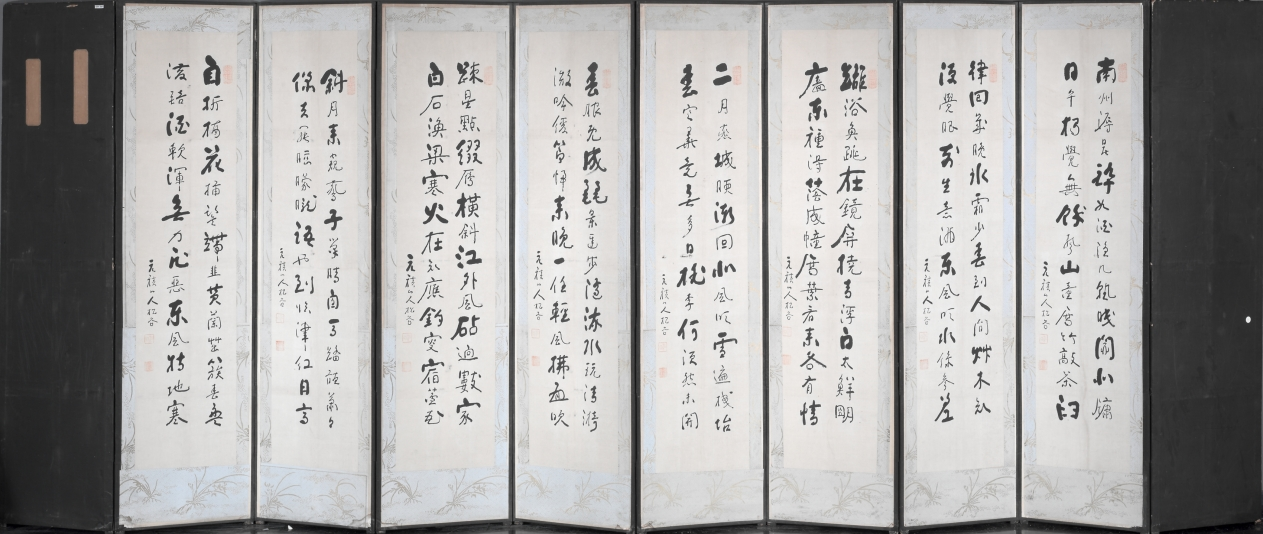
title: Painting of One Hundred Themes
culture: Korea, Joseon dynasty (1392–1910)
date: late 1800s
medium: Ten-panel folding screen affixed with album leaves (obverse), calligraphy (reverse), ink and color on silk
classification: Painting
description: The front of this screen features an assortment of subjects: birds and flowers, landscapes, and scenes of everyday life, mostly in monochromatic ink with light colors. The screen’s reverse side conveys a number of classical poems about the fleeting beauty of the four seasons. Traditionally, only one side of a folding screen bears painted or embroidered images, since these were used as a background furnishing. In Korean houses by the 1800s and early 1900s, however, two-sided folding screens became noticeably popular, possibly inspired by Japanese double-sided folding screens, which mainly served as room dividers in Japanese households.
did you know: The way of displaying small images of various subjects became one of the most popular type of painting toward the end of the 19th century.